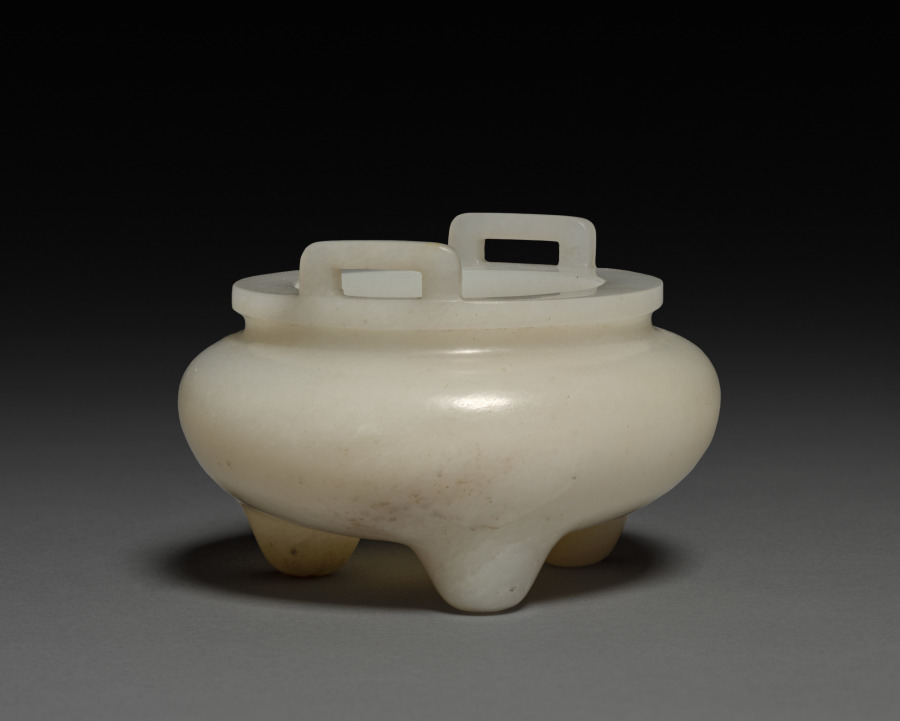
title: Tripod Incense Burner, Ding Shape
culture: China, Qing dynasty (1644-1911)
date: 1644–1911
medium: jade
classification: Jade